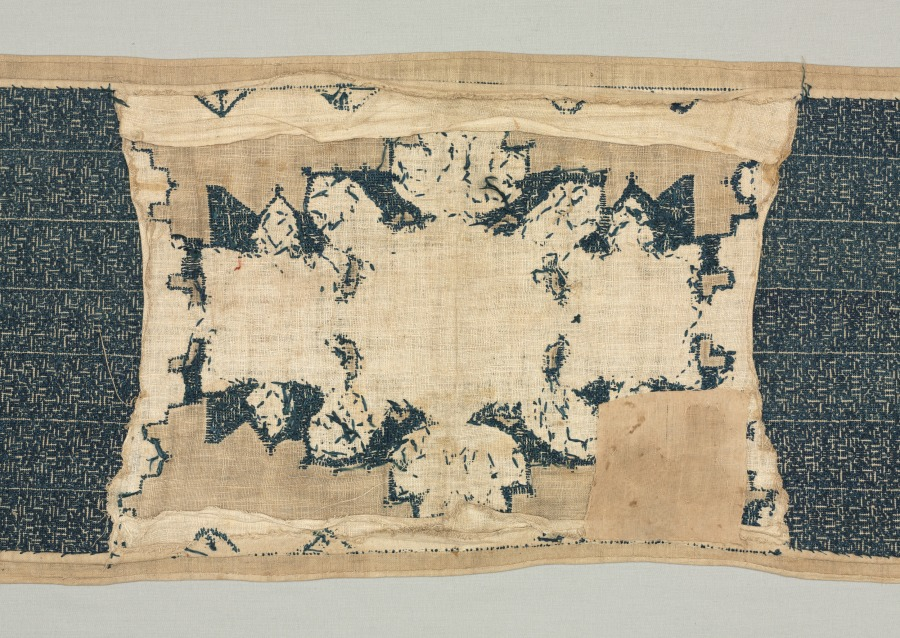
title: Furnishing textile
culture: Africa, North Africa, Morocco, Chefchaouen, Moroccan embroiderer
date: 1600s–1700s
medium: silk on linen tabby ground, embroidery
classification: Embroidery